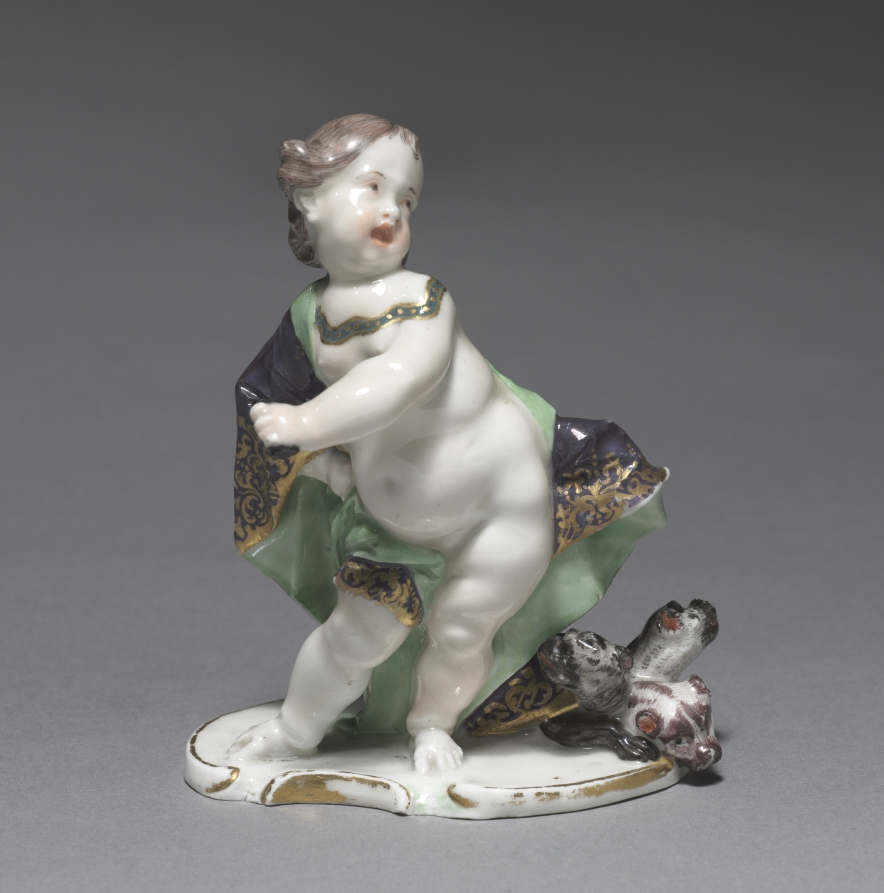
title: Pluto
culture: Germany, Nymphenburg, 18th century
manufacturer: Nymphenburg Porcelain Factory (German, founded 1747)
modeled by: Franz Anton Bustelli (Swiss, 1723–1763)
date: c. 1760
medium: porcelain with enamel and gilt decoration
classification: Ceramic